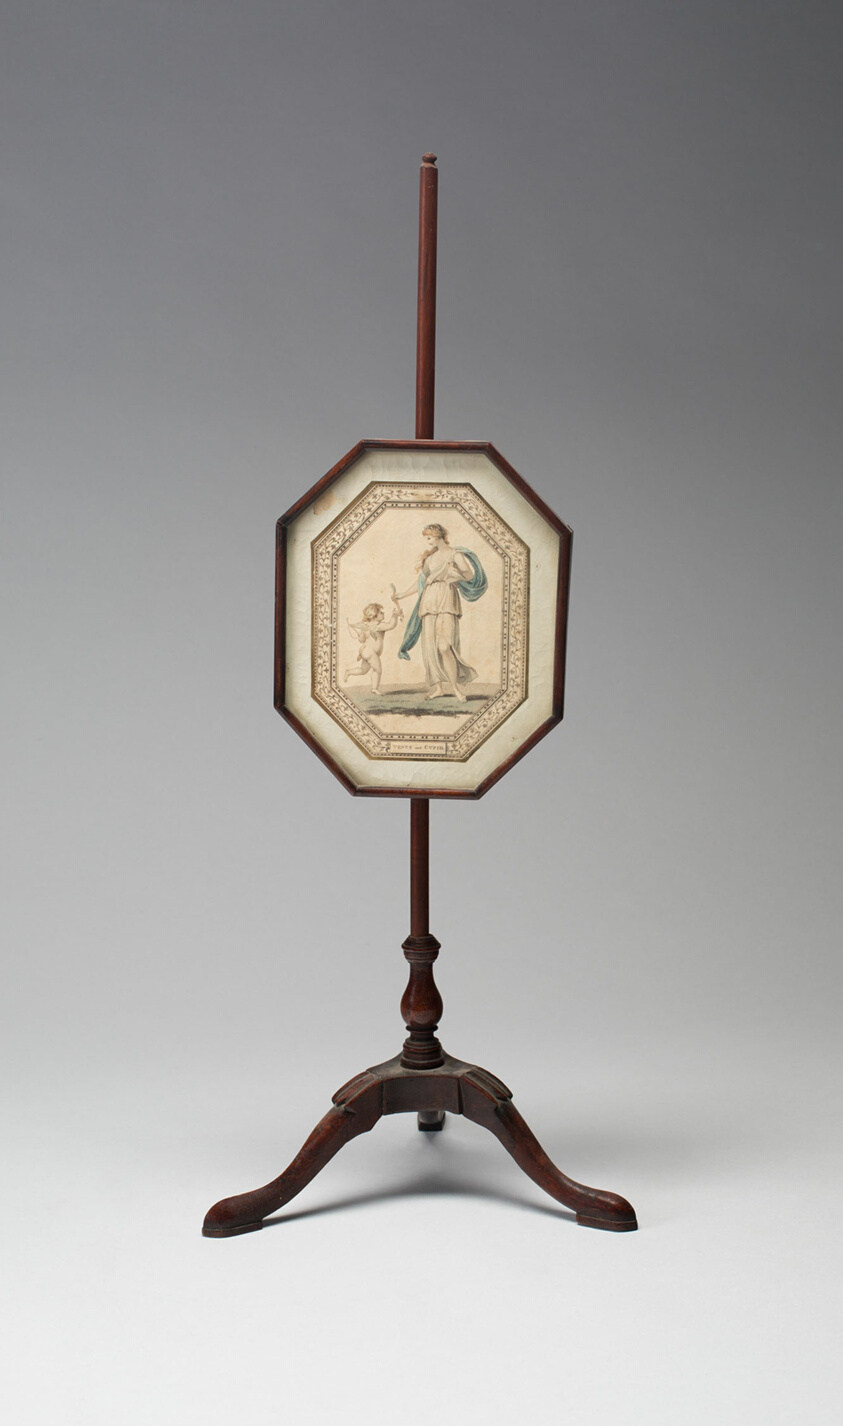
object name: Furniture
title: Pole Screen with Venus and Cupid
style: adam style, european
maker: England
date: Late 18th century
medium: Mahogany, hand colored engraving, gilding, and metal mounts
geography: England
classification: screen; furniture; european decorative arts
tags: furniture